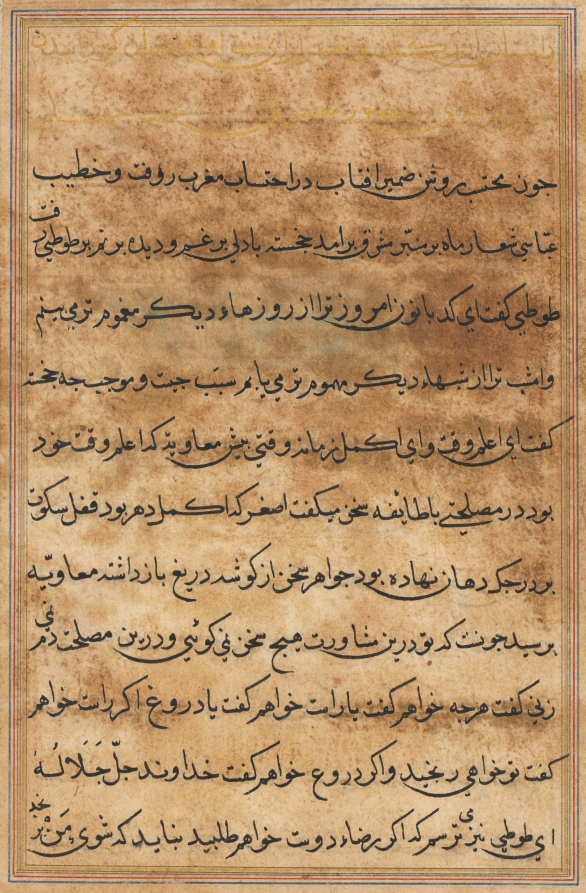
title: Page from Tales of a Parrot (Tuti-nama): text page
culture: Mughal India, court of Akbar (reigned 1556–1605)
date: c. 1560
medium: gum tempera, ink, and gold on paper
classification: Painting